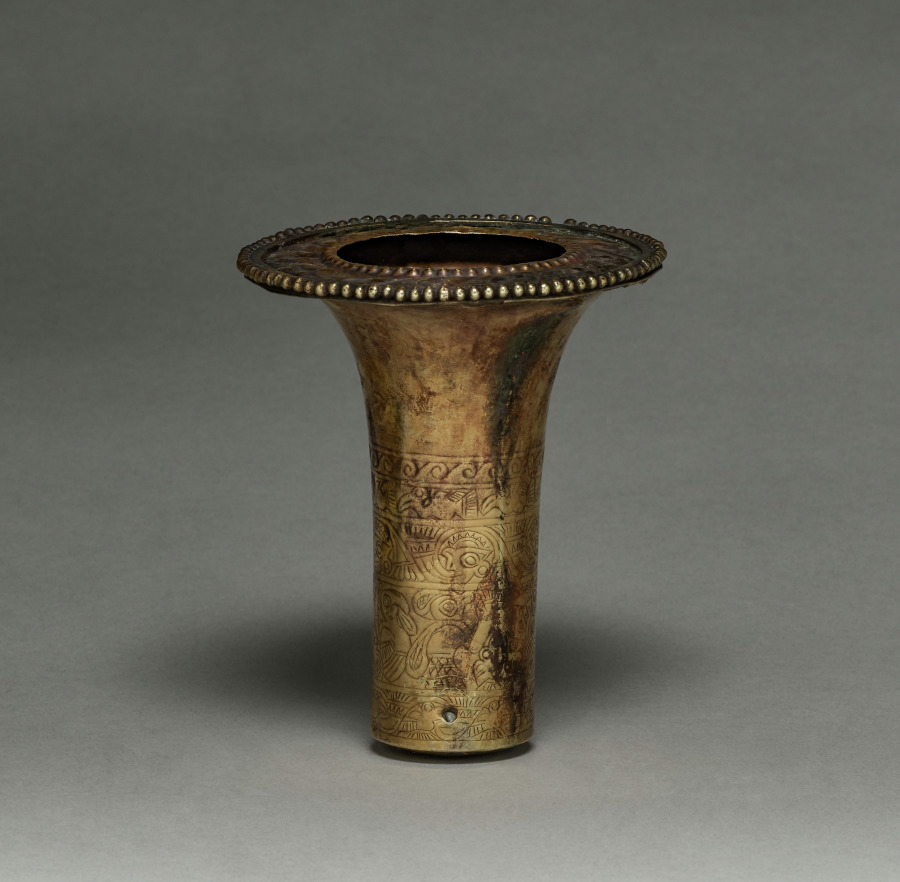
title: Ear Flare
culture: Peru, North Coast, Chimú style (900-1470)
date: 900–1470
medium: hammered gold alloy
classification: Metalwork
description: North Coast ear ornaments typically have a long shaft that balanced the weight of the glorious frontal. This pair illustrates Chimú interest in the sea, which had great economic and religious importance. On the shafts are bands of seabirds and waves, and a similar pattern edges the frontals, which were altered in modern times. Originally solid disks, the frontals' centers were cut out and a dotted band was added to the rim.